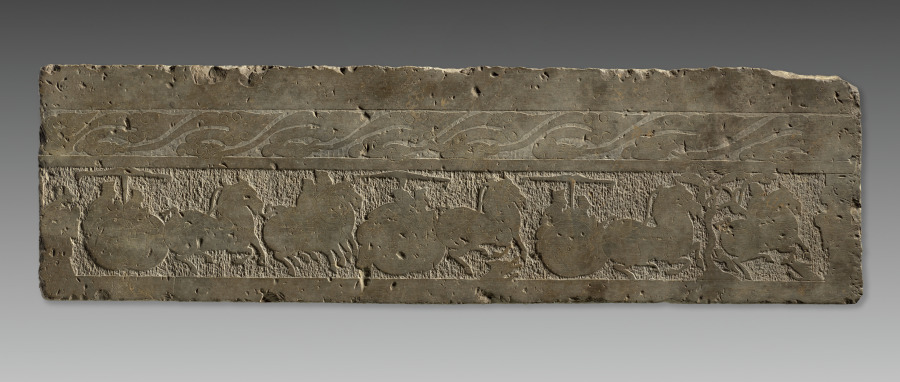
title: Frieze Fragment with Chariot Procession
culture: China, style of Wu Family Shrines, Jiaxiang district, Shandong province, Eastern Han dynasty (25–220 CE)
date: 100s CE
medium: stone carved in low relief with engraved detail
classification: Sculpture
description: The frieze shows a procession of horse-drawn chariots passing through terrain animated with wild animals and a monkey climbing a tree. The border of swirling clouds above conveys associations with heaven or the remote land of immortals in the high mountains. Comparable in style with the stone reliefs of the Wu Family shrines, this stone may have been originally carved for a local Eastern Han dynasty family tomb of similar status. To take a rubbing of the frieze, a moistened sheet of paper is laid over the slab and tamped with an ink pad that then darkens the raised areas, leaving concave sections and incised lines blank.